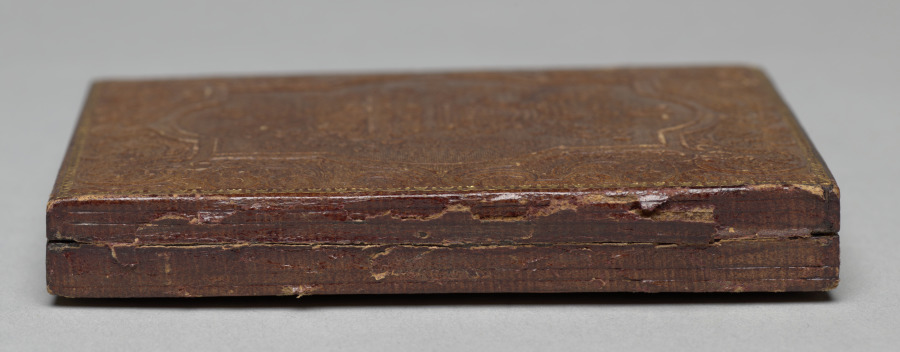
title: Cyrus B. Hills, Postmaster, Arlington, Vermont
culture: America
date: c. 1852–53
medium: daguerreotype, quarter plate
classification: Photograph